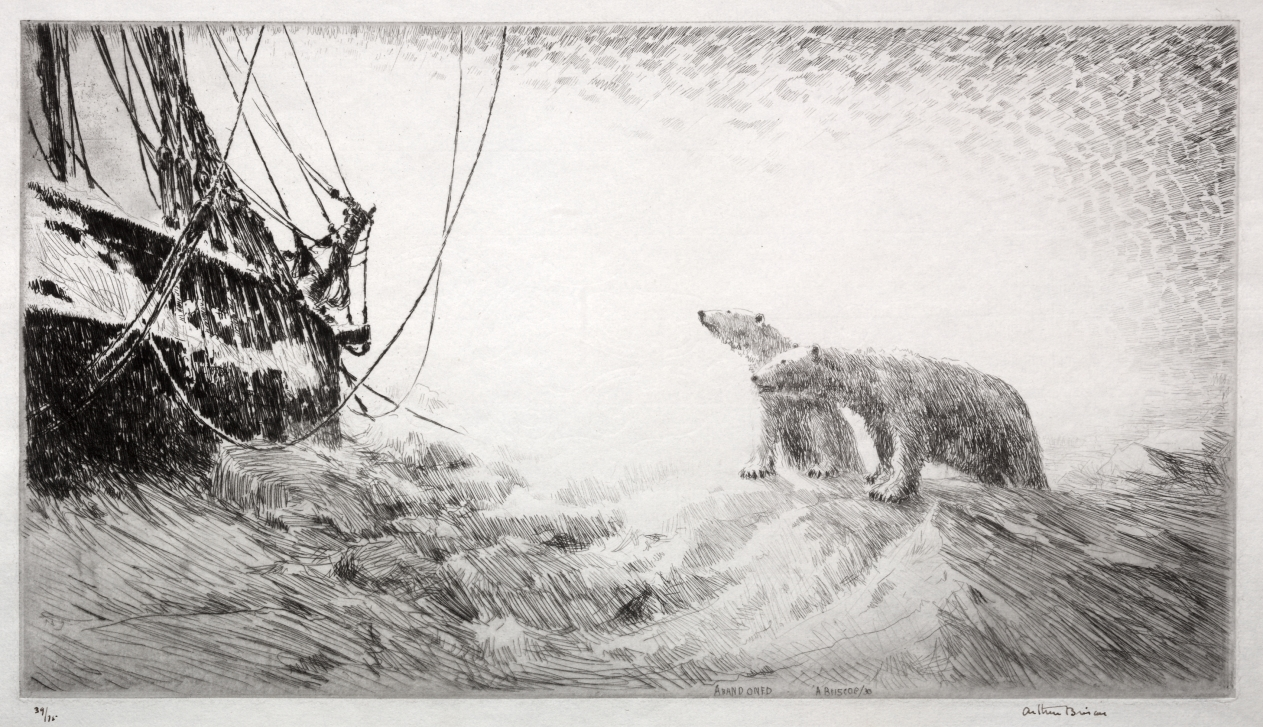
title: Abandoned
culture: England, 20th century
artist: Arthur John Trevor Briscoe (British, 1873–1943)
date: 1930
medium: etching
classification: Print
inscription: Lower margin, in ink: 39/75 Arthur Briscoe